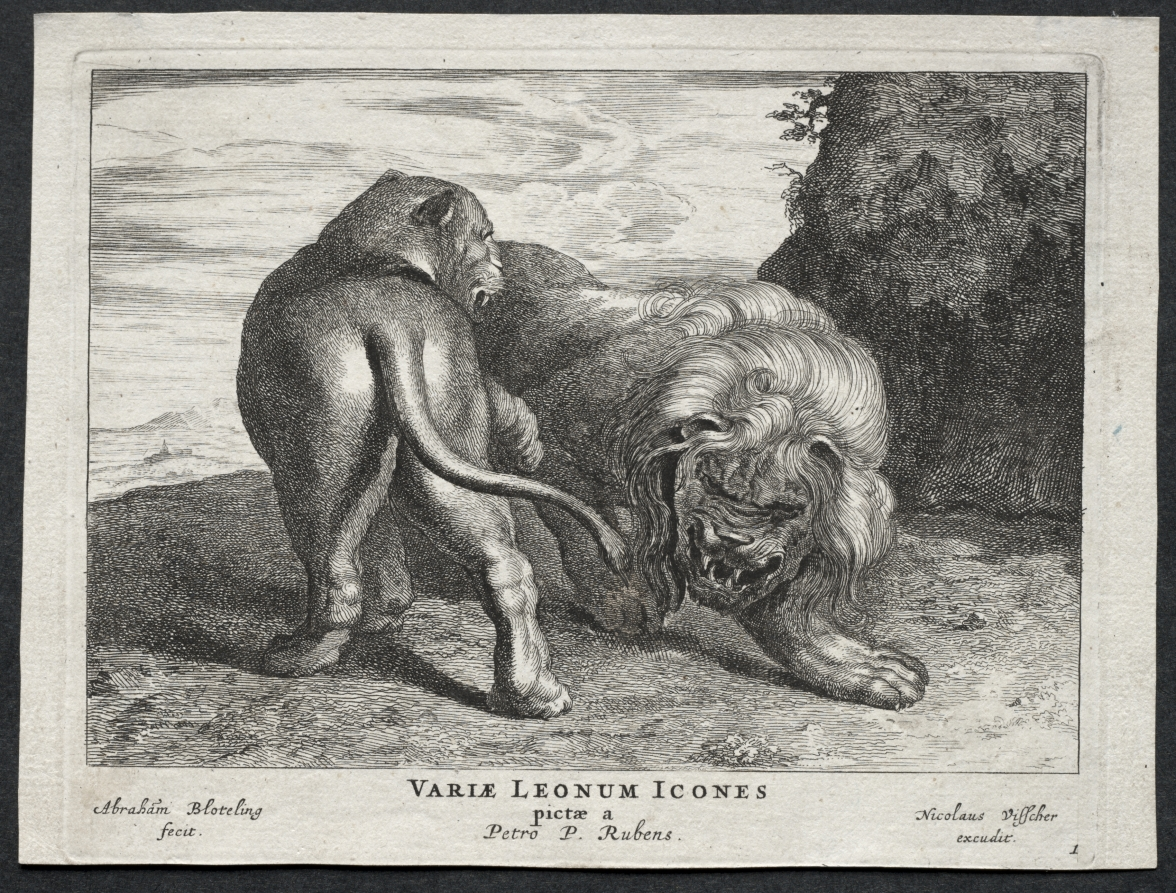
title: Various Lions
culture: Netherlands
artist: Abraham Blooteling (Dutch, 1640–1690)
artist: after Peter Paul Rubens (Flemish, 1577–1640)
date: 1655–90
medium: etching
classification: Print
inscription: Verso: indecipherable collector's stamp (faded due to cleaning)